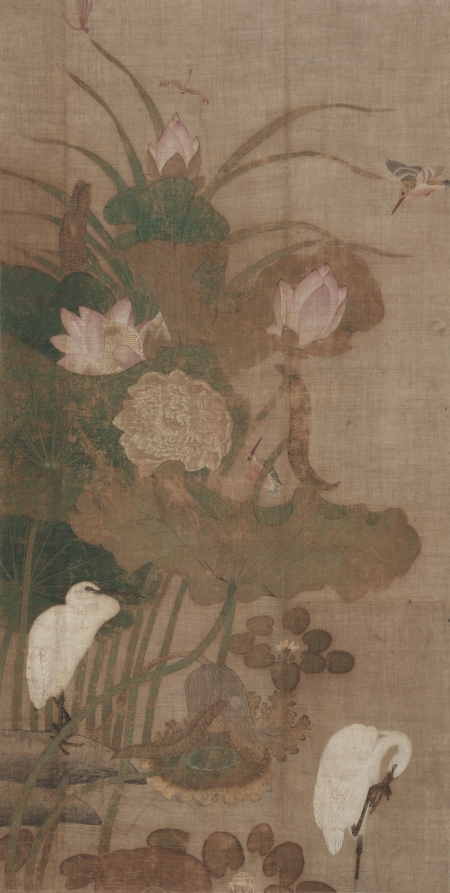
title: Lotuses, Insects, and Birds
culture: Korea, Joseon dynasty (1392–1910)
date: 1800s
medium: hanging scroll; ink and color on silk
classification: Painting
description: Pairs of herons, kingfishers, and dragonflies punctuate a profusion of lotus in this composition that, given the orientation of the herons and the clustering of motifs in the left-hand side of the work, may have once been the left painting of a pair. Given its subject matter, this hanging scroll may have been hung for display during the summer.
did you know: Given its subject matter of lotus flowers, herons, kingfisher, and dragonflies, this hanging scroll may have been hung for display during the summer.